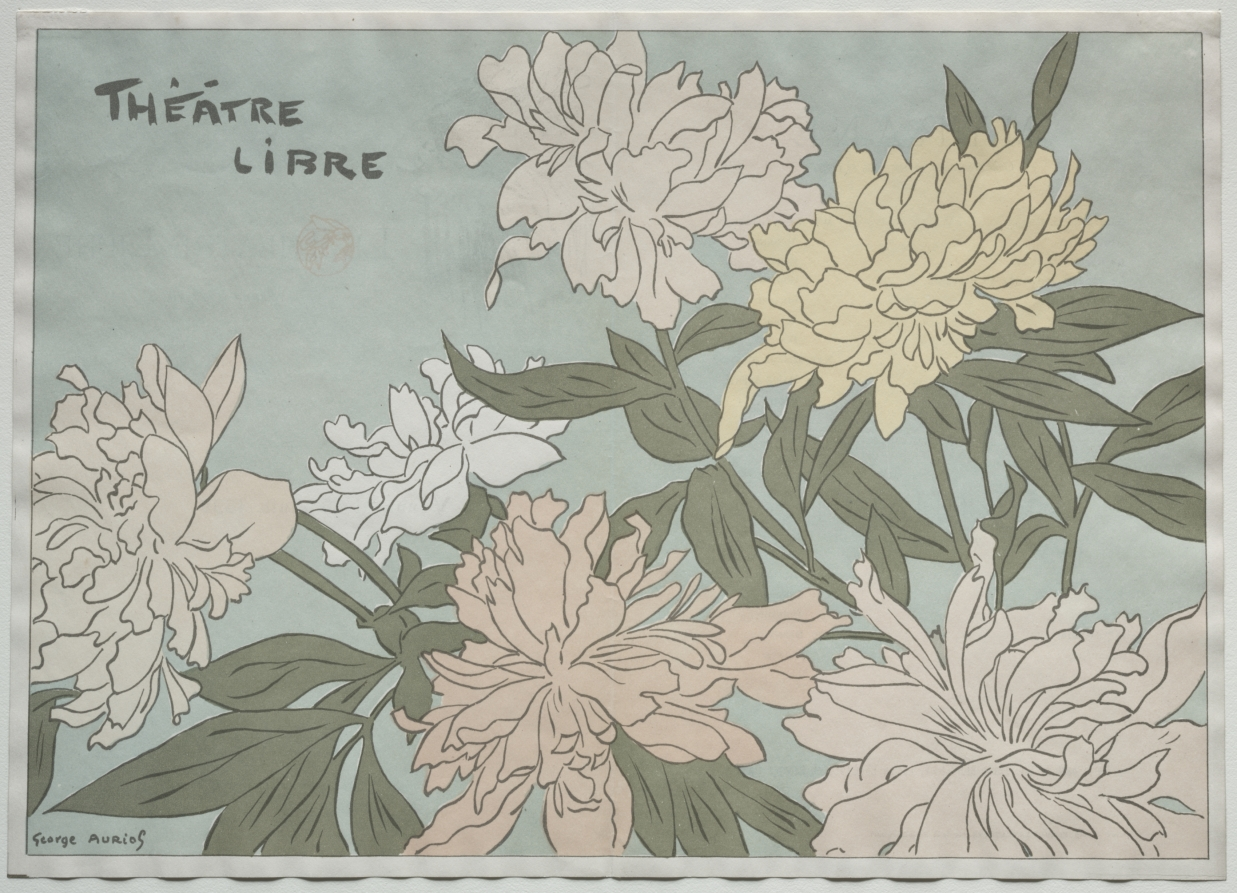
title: "Myrane" et "Les Chapons"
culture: France, 19th century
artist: George Auriol (French, 1863–1938)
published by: Eugene Verneau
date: 1890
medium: color lithograph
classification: Print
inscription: upper left, in stone: Théâtre Libre lower left, in stone: George Aurios